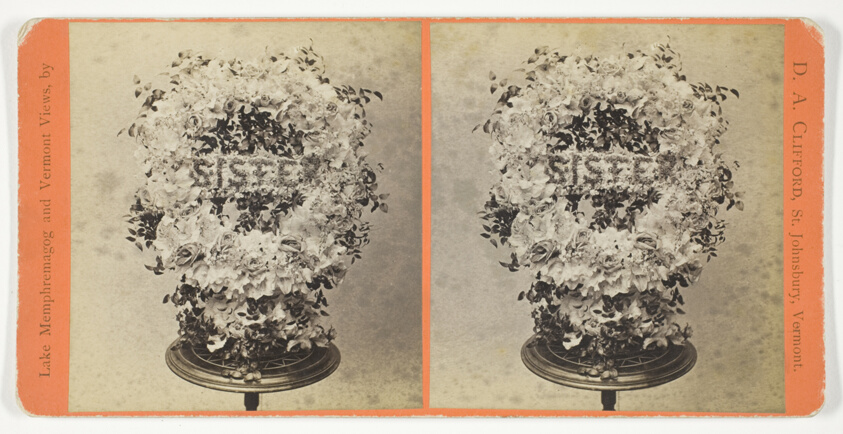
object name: Photograph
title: Flower Piece at Kate Bemis' Funeral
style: 19th century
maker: D. A. Clifford; American, late 19th century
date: April 13, 1886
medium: Albumen print, stereo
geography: Saint Johnsbury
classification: photography; photograph